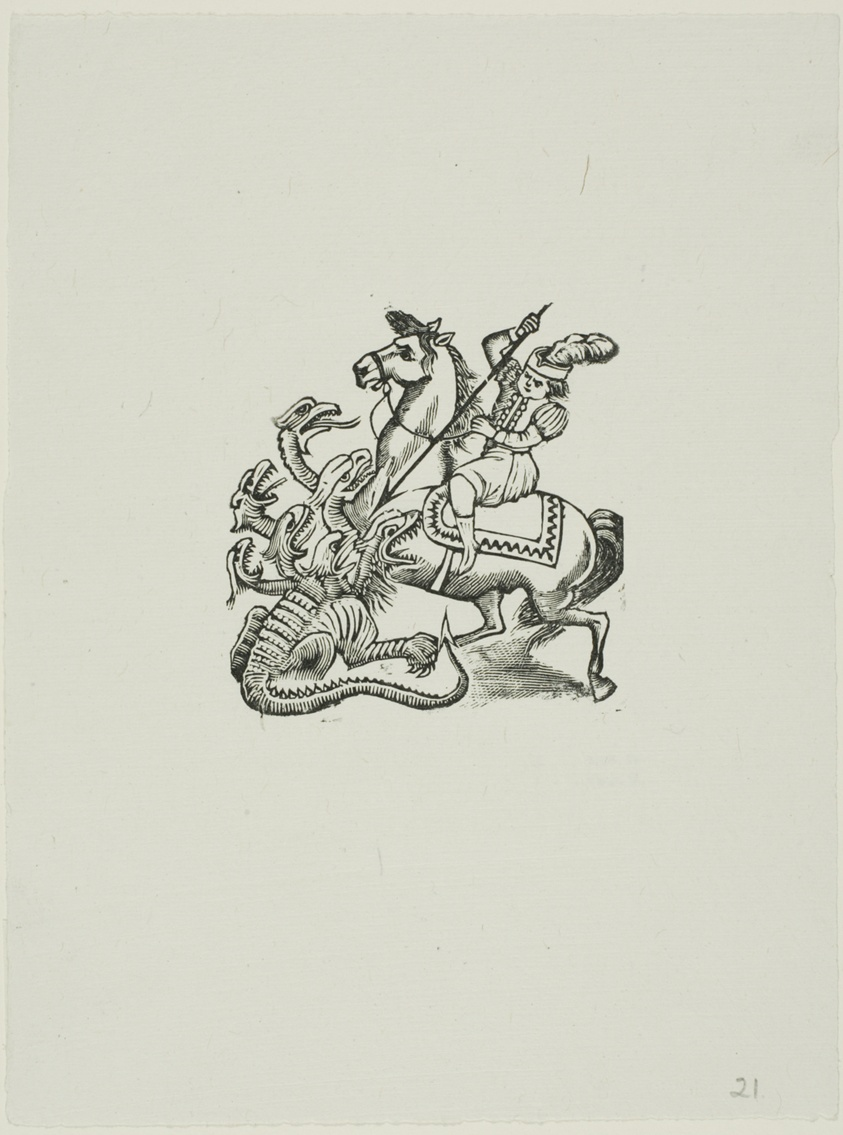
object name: Print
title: Saint George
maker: José Guadalupe Posada (Mexican, 1852-1913)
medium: Relief engraving on typemetal on paper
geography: Mexico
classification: relief etching; print; prints and drawing